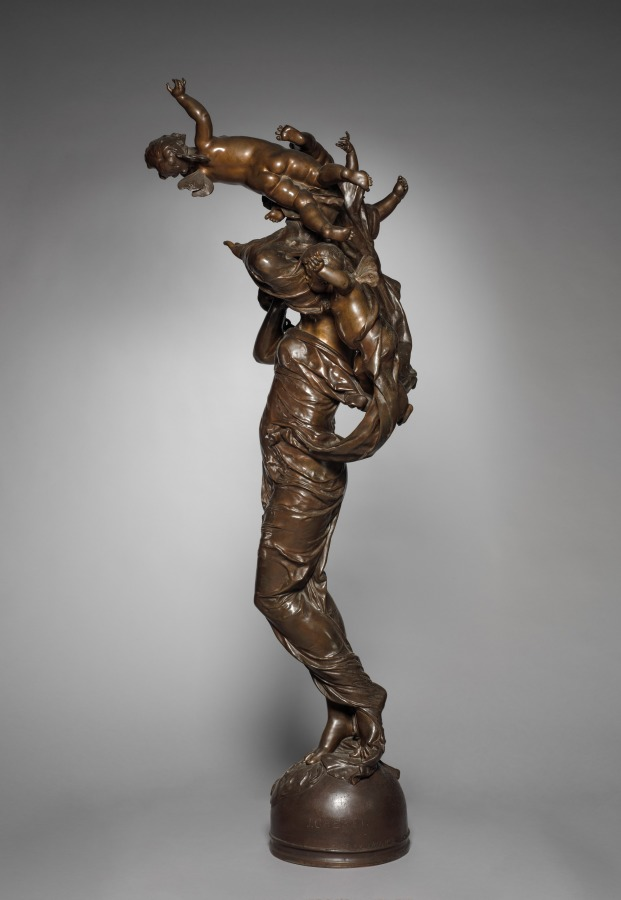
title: Dawn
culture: France, 19th century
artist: Gustave-Joseph Chéret (French, 1838–1894)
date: c. 1883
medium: bronze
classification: Sculpture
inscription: signed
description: This sculpture is of the same design as one exhibited by Chéret at the Paris Salon of 1883.